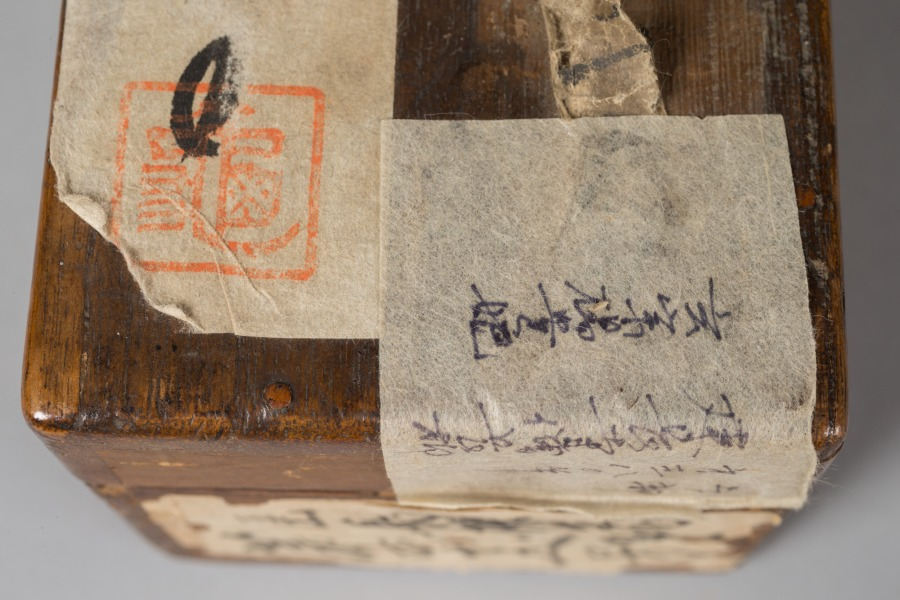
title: Emperor Minghuang Teaching Yang Gueifei to Play the Flute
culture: Japan, Muromachi period (1392–1573)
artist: Choryusai (Japanese)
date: late 1400s–early 1500s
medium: hanging scroll; ink and color on paper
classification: Painting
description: Minghuang, a prominent emperor of Tang (618-906) China and his consort, Yang Gueifei, have inspired many legends, paintings, and poetry in later Chinese culture. Through the study of Chinese literature and the collecting of Chinese paintings, tales of their lives and romance became well-known in Muromachi Japan.